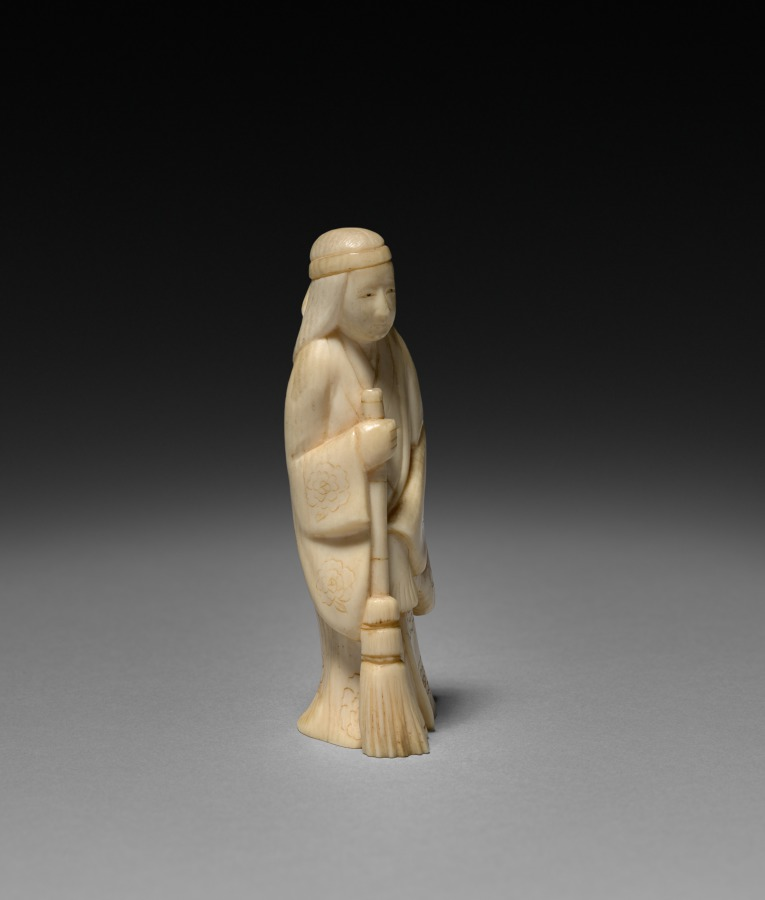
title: Woman with Broom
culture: Japan, Meiji period (1868–1912)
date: early 1900s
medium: ivory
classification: Ivory